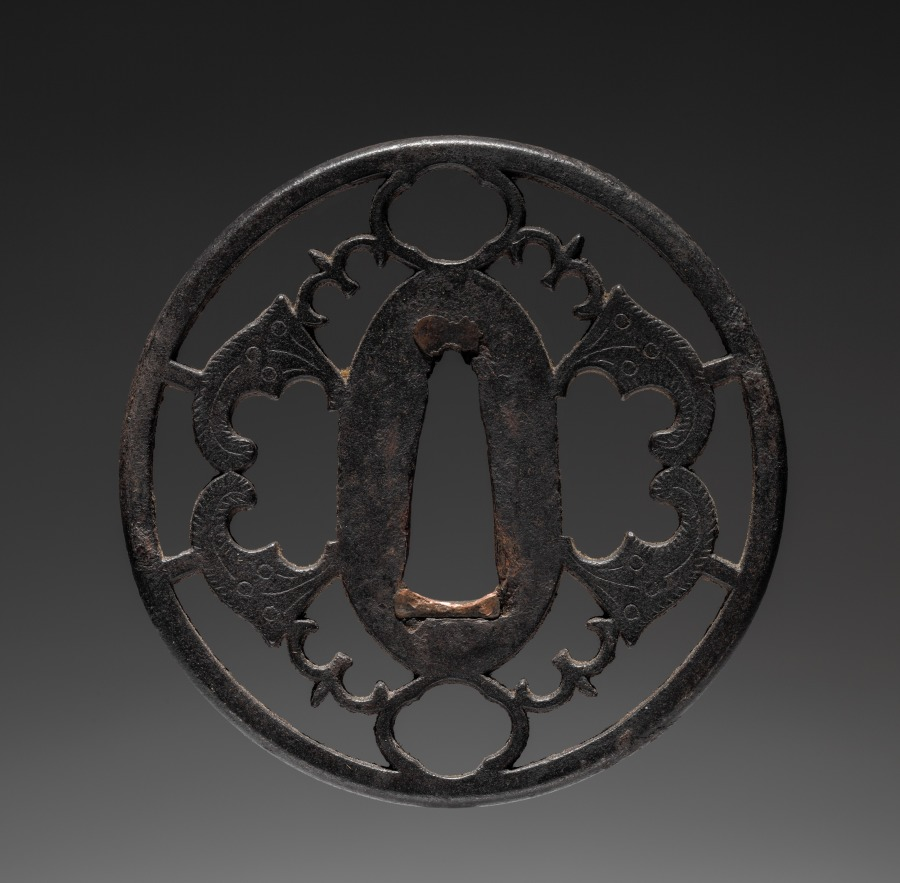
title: Sword Guard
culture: Japan, Edo period (1615–1868)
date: 1615–1868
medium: iron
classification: Arms and Armor